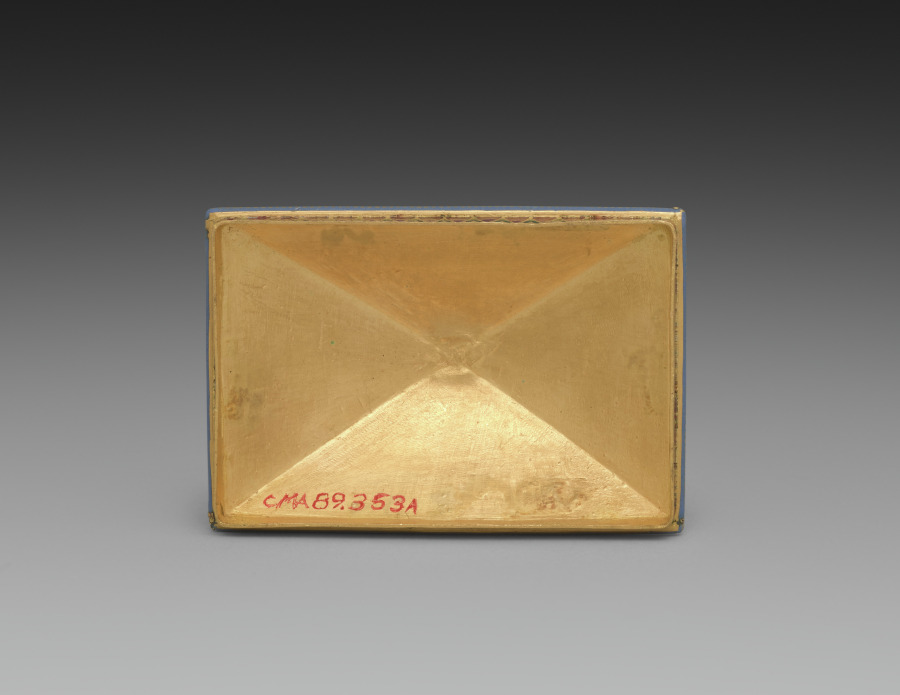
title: Cover for a Box Decorated with Shiva, Vishnu, Krishna, and Ganesha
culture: Northwestern India, Rajasthan, Rajput Kingdom of Jaipur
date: c. 1800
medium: gold with enamel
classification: Metalwork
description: This box is covered in a variety of birds, animals, and plants. The central motifs on the lids include images of four Hindu gods: Shiva, Krishna, Vishnu, and Ganesha. The blue figures are Vishnu and Krishna, the latter of which is an incarnation of the former who is shown playing a flute. The elephant-headed Ganesha is red and accompanied by his mount, the bandicoot rat Dinka. The four-armed Shiva is paired with two animals, including a tiger and his sacred bull mount Nandi. Small enamel boxes could be used to house many different substances, from cosmetics to spices to stimulants, including opium and paan, a digestive typically given at formal gatherings as a sign of the host’s hospitality.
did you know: Ganesha’s mount is the rat by his left knee.